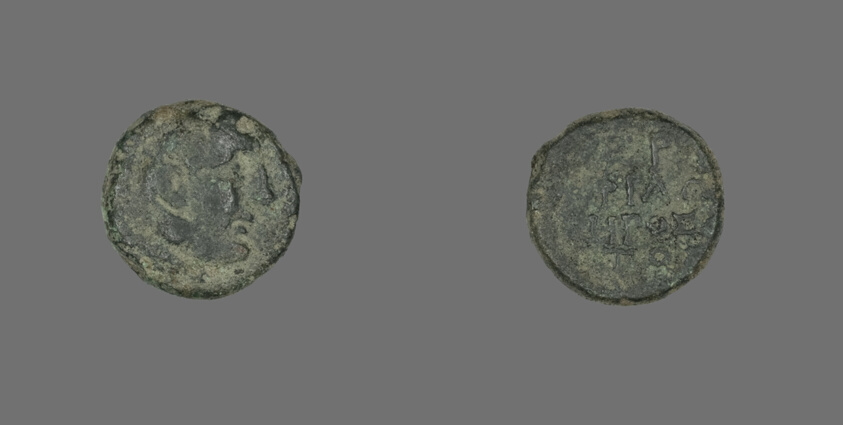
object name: Coin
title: Coin Depicting the Hero Herakles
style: greek, ancient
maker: Greek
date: about 300-200 BCE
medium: Bronze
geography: Ancient Greece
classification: coin; ancient art